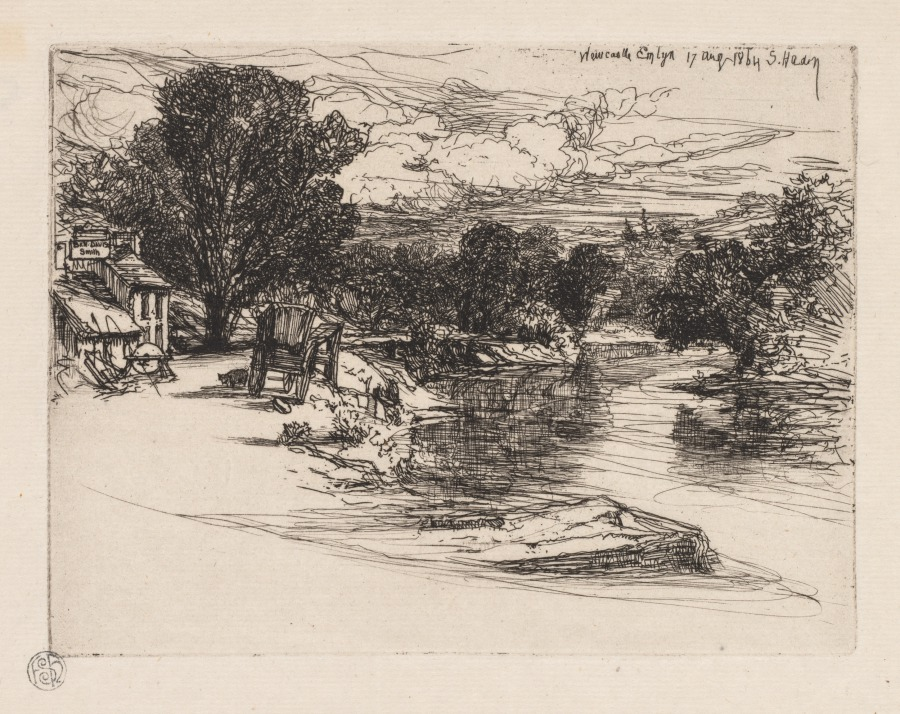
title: House of the Smyth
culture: Britain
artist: Francis Seymour Haden (British, 1818–1910)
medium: etching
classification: Print